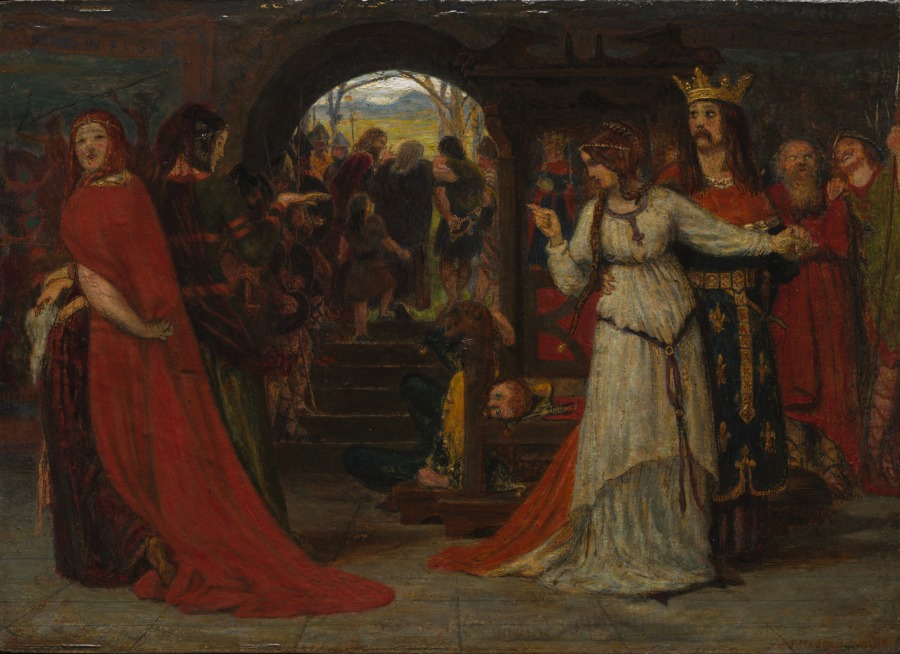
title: Cordelia Parting from her Sisters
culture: England, 19th century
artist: Ford Madox Brown (British, 1821–1893)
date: 1854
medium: pen and oil on paper on panel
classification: Painting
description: Reimagining English history was one way that Victorian (1837–1901) artists rooted themselves during a period of tremendous social and political change and life-altering technological advances. Ford Madox Brown’s expressive and vividly colored sketch for an unrealized project takes a story from Britain’s most famous playwright, Shakespeare. The artist chooses the dramatic moment when King Lear’s daughter Cordelia parts ways with her sisters.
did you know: In 1861, Ford Madox Brown became a founding member of William Morris’s decorative arts company. Besides painting, he also designed stained glass and furniture.